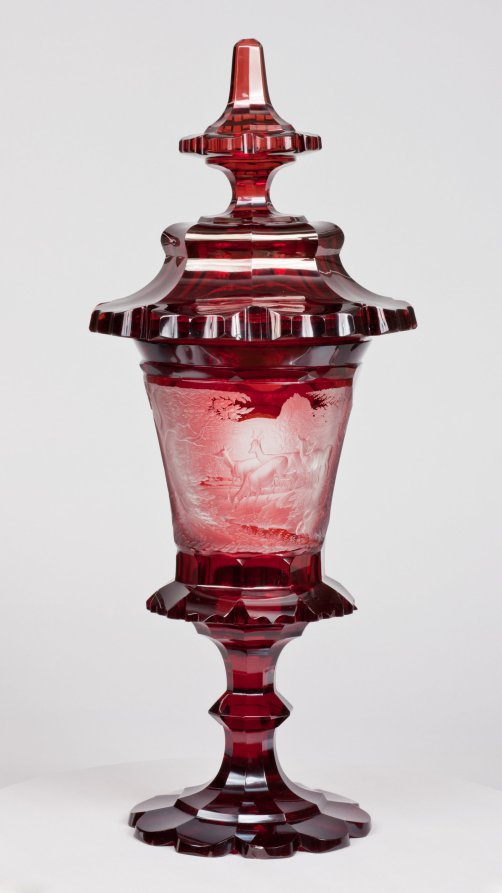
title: Covered Cup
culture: Bohemia, 19th century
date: mid-1800s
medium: ruby glass with engraved decoration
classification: Glass